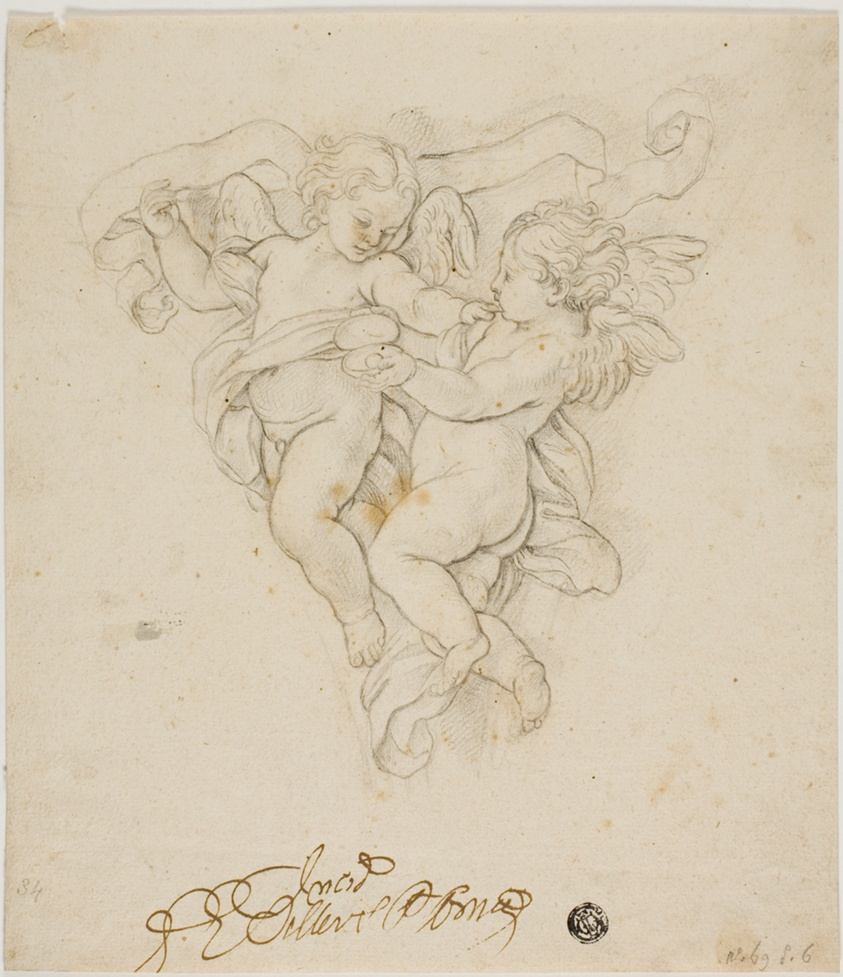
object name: Drawing and Watercolor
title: Spandrel Decoration with Two Putti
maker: After Carlo Maratti; Italian, 1625-1713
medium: Black crayon, over touches of graphite, on cream laid paper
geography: Italy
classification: graphite; drawings (visual works); prints and drawing